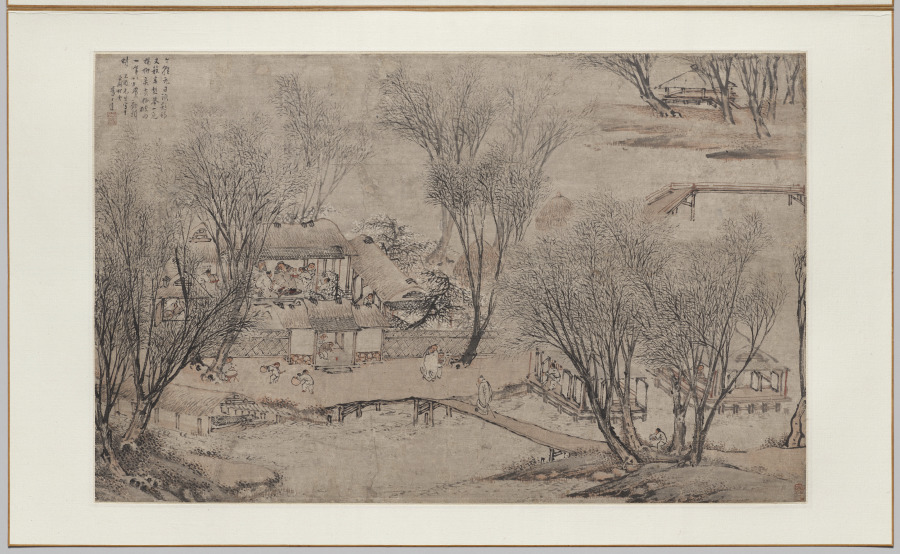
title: New Year's Day in a Village at Stone Lake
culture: China, Ming dynasty (1368–1644)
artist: Li Shida (Chinese, c. 1549–c. 1621)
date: 1609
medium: Album leaf; ink and light color on paper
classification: Painting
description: This rural scene presents typical activities of a New Year’s Day in which relatives and friends approach the house to convey their good wishes to the elders. Two boys in the courtyard light fire crackers, and servants in front of the main gate beat the gong to announce the guests. Inside the house, the hosts entertain their guests by offering hot wine and by writing New Year couplets to be hung on the gates welcoming the New Year. White cherry blossoms announce the spring. The water village at Stone Lake is characteristic of the Jiangnan region in southeast China. Born in Suzhou, the artist Li Shida may have even had his hometown in mind when he produced this painting.